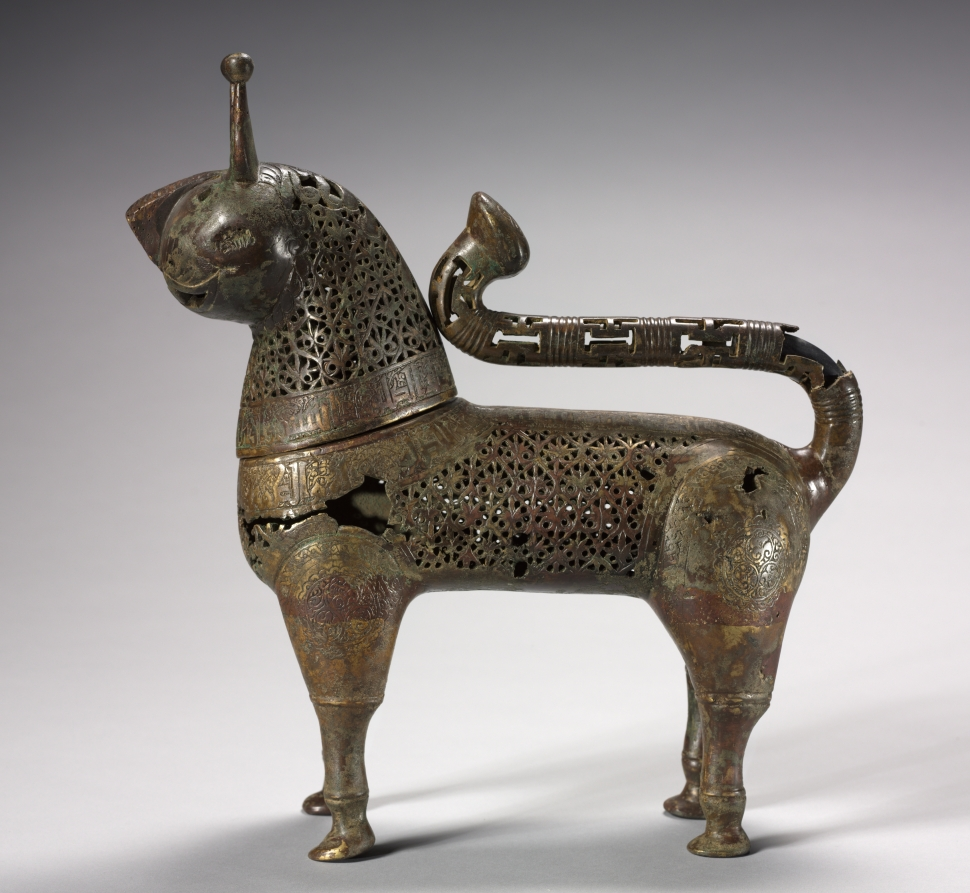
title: Feline Incense Burner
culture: Iran, Khurasan, Seljuq period of Iran (1037–1194)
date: 1150–1200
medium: Copper alloy, cast, engraved, chased, and pierced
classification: Metalwork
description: In Iran during the 1000s and 1100s, vessels in the shape of animals gained popularity, especially as incense burners. Felines were favored in Persian art and this piece may represent a caracal, a type of lynx. The head of the creature was cast separately and is removable to fill its body with hot coals and incense. Qur’anic verses on the neck and spine remind worshippers to set work aside, attend prayer, and then disperse to seek God’s bounty. The diffusion of perfumed smoke through the burner’s pierced palmette design may have served as a sensorial reminder of this teaching.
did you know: Arabic inscriptions in Kufic script against a background of scrolling arabesques run along the back and neck of the feline form.